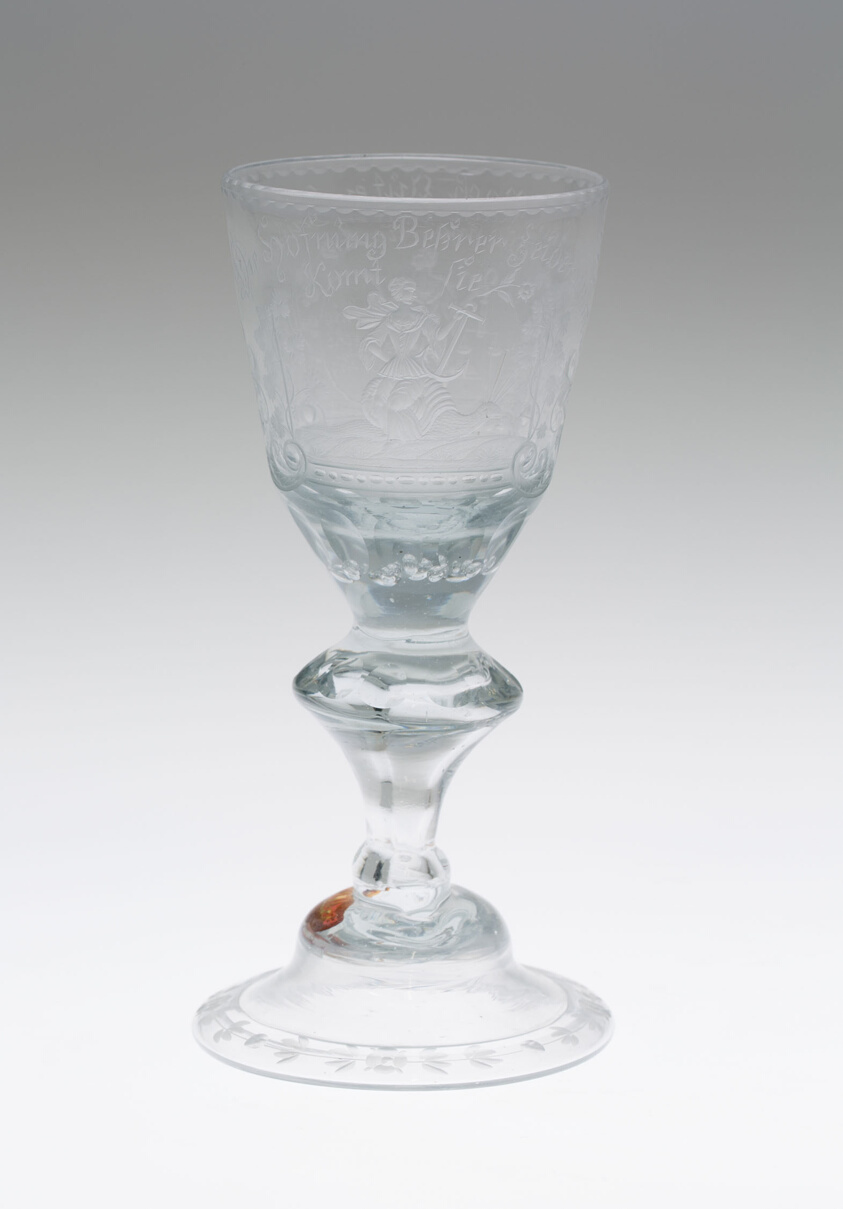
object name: Glass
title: Goblet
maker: Germany, Thuringia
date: c. 1730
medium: Glass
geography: Thuringia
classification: drinking vessel; glass; european decorative arts